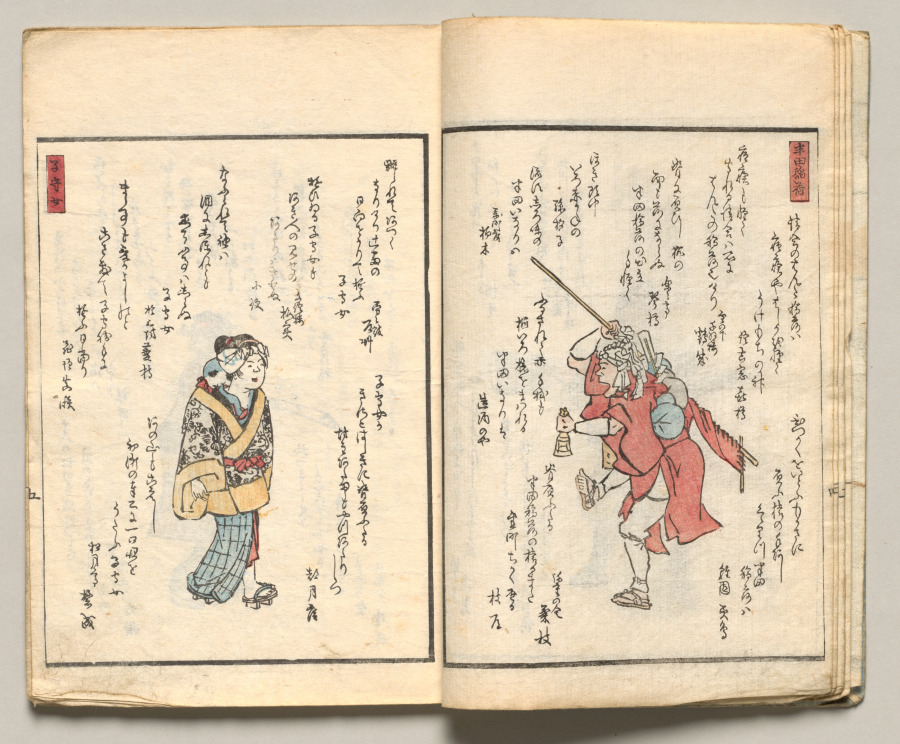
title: Spread Five from Volume Six of People of Japan in Light Verse (Kyōka)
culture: Japan, Edo period (1615–1868)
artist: Utagawa Hiroshige (Japanese, 1797–1858)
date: 1857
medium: Woodblock-printed book; ink and color on paper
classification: Bound Volume